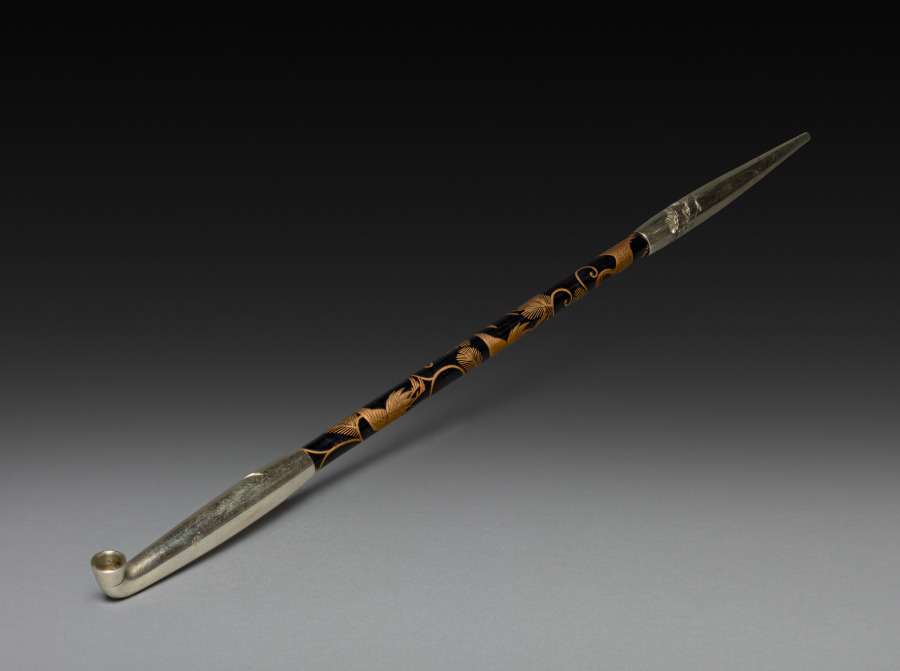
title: Tobacco Pipe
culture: Japan, Edo period (1615–1868)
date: early to mid-1800s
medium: wood and metal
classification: Miscellaneous